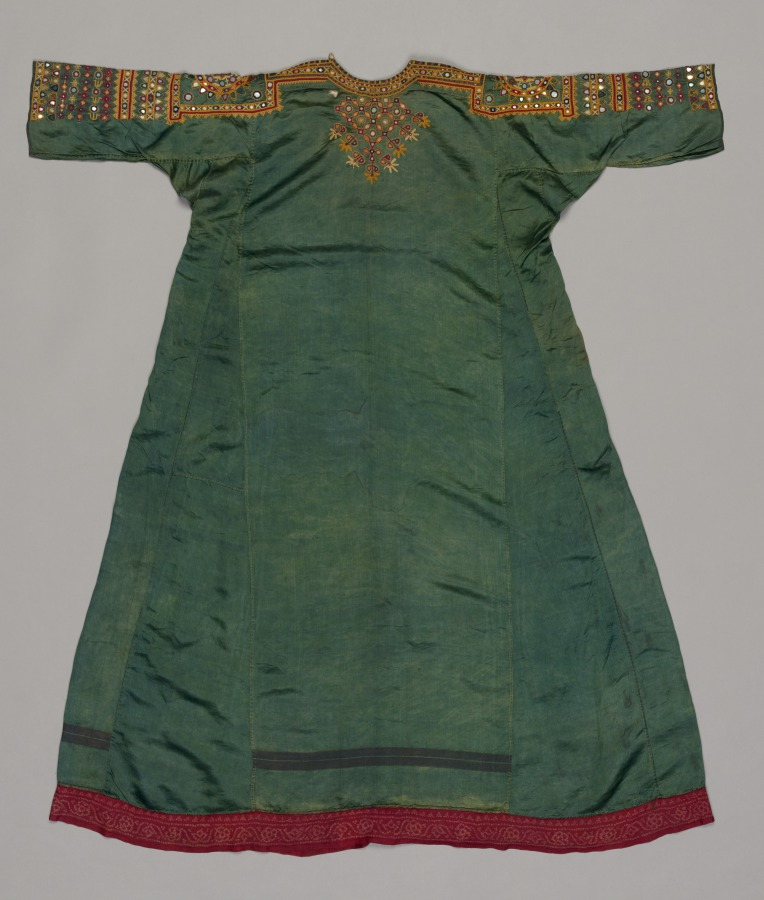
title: Woman's Dress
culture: Western India, Gujarat, Kachchh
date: 1800s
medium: silk thread on silk ground, embroidery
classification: Garment